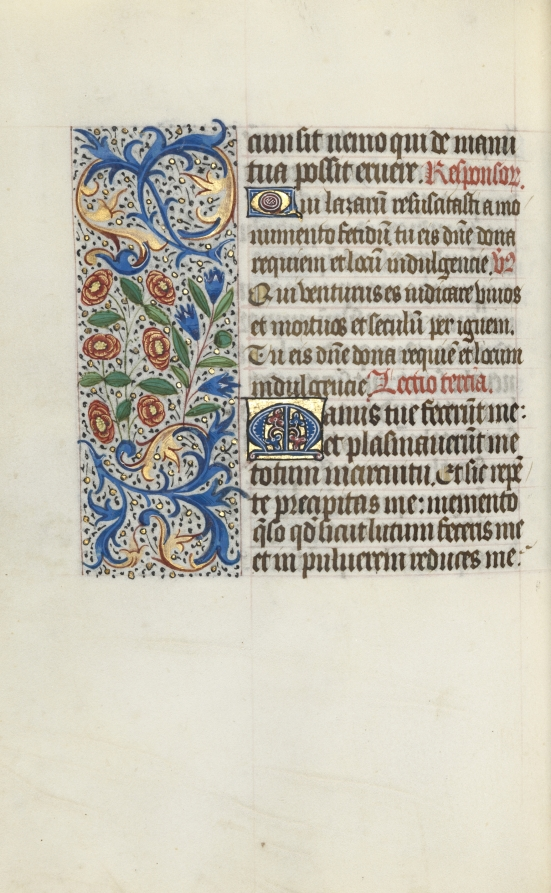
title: Book of Hours (Use of Rouen): fol. 116v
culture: France, Rouen, 15th century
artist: Master of the Geneva Latini (French, active Rouen, 1460–80)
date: c. 1470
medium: ink, tempera, and gold on vellum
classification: Bound Volume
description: In the late 1400s and early 1500s Rouen was an established and important center of book production. The city’s cathedral had a wealthy chapter that spent large sums of money to commission books and to maintain its extensive library. The stationers and booksellers would have likely been concentrated in or near the cathedral precinct. This artist, named after a manuscript now in Geneva, was Rouen’s principal illuminator during the second half of the 1400s.